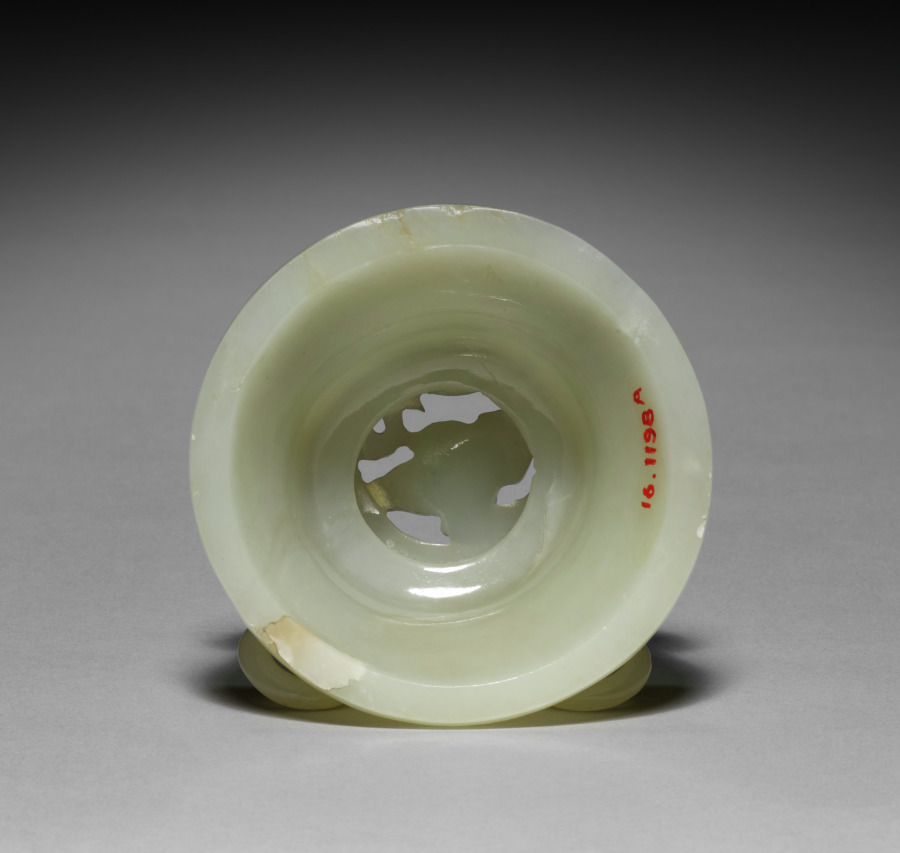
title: Tripod Incense Burner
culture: China, Qing dynasty (1644-1911)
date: 1644–1911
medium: jade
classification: Jade